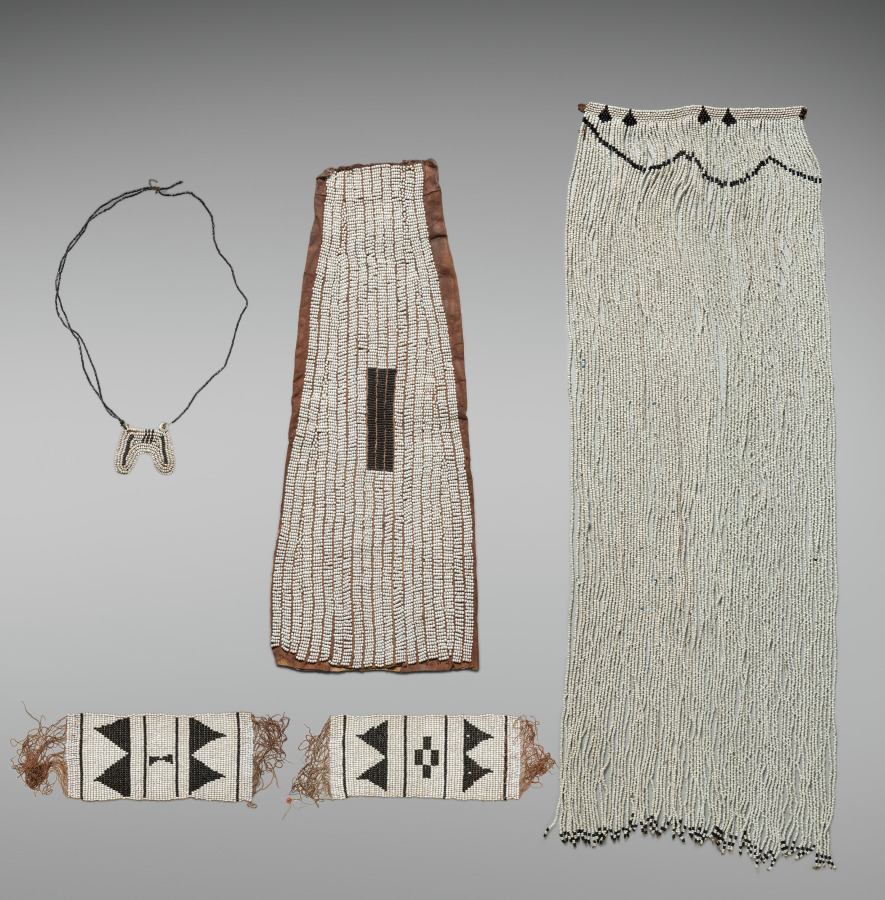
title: Ceremonial beadwork for a Xhosa royal woman: headdress (umnqwazi), pendant, breast cover (incebetha), pair of anklets (izitsaba)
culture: Africa, Southern Africa, South Africa, Southeast Cape Region, Unknown female Xhosa-style maker(s)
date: 1800s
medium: Glass beads, sinew, hide, ceramic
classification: Mixed Media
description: Elite Xhosa women once wore beaded garments like this on festive occasions. Made almost completely from imported Venetian or Bohemian glass beads, they were overt status symbols. Imported beads functioned as money for the Xhosa between about 1770 and 1829. These garments’ female maker carefully selected beads of the highest quality, uniform in color, shape, and size. Made in the same shape as the pendant, a swallowtail-shaped apron (CMA 2010.206) worn under the skirt completed the ensemble.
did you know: The beads to make an ensemble like this cost several cattle in the early nineteenth century, an amount most couldn't afford.